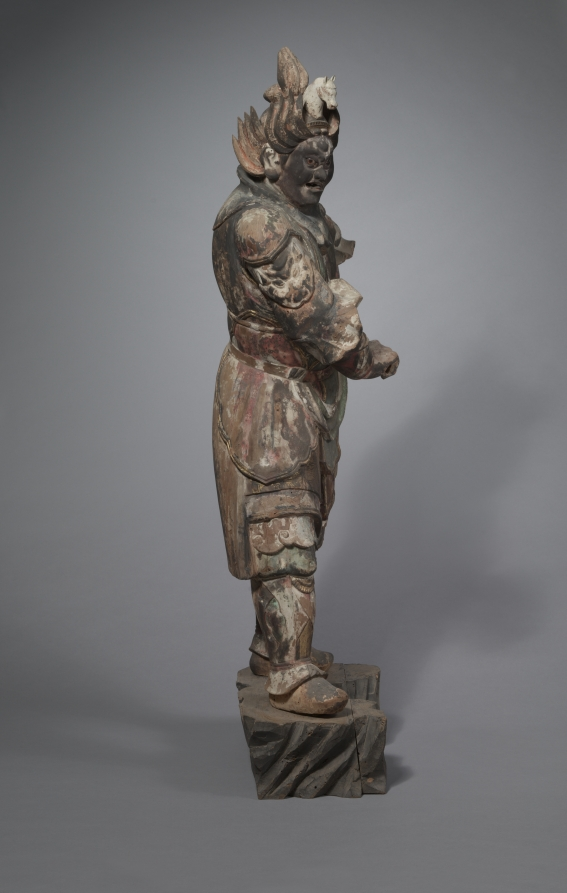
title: A Heavenly General (One of the Junishinshō)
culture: Japan, Kamakura period (1185–1333)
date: 1200s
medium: Wood with lacquer, color, gold, and crystal eyes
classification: Sculpture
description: This dynamic figure was originally part of a set of Twelve Divine Generals (Junishinshō) that stood in a Japanese Buddhist temple hall, protecting the central icon of Yakushi Nyorai, the Healing Buddha. This sculpture was constructed from many pieces of thinly carved wood joined together with pins, then covered with hemp cloth and lacquer paste, and finally decorated with pigments. Eyes made of crystal, with painted details, finish the composition. The proliferation of religious sites throughout Japan in the 1200s, particularly in Kyoto, kept sculptors’ studios busy creating religious icons.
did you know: A fierce facial expression warns us not to cross this protective deity.